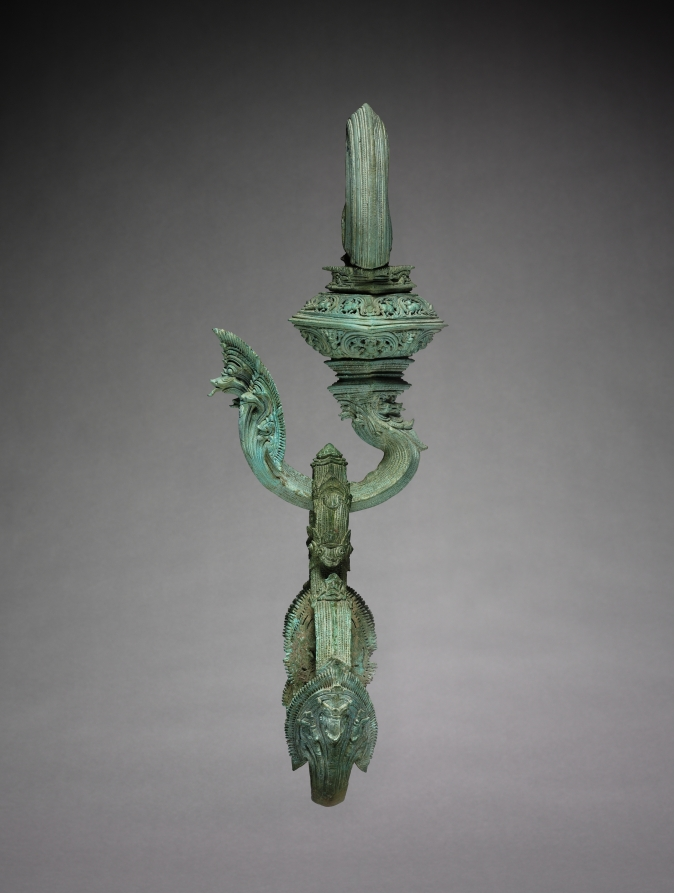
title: One of a Pair of Decorated Palanquin Hooks and Rings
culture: Cambodia, Angkor Wat Style, 12th century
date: 1100–1175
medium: bronze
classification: Sculpture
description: Hooks, suspension rings, and finials cast in bronze are very common fixtures in Cambodian decorative art. Frequently they served a practical function, such as the present set, used for a palanquin in which a person was carried from place to place. The litter or throne was fastened to the rings which in turn were suspended from the books fixed by bolts to transverse poles carried on the shoulders of the palanquin bearers. Chariots, palanquins, furniture, and harnesses were frequently embellished with various bronze decorations, finials, and fixtures. Those, as a rule, were gilded making the objects they served look very sumptuous. The relief sculpture found on various Khmer monuments, such as Angkor Wat or Bayon for instance, illustrates well the use and context of those bronze implements in ancient Cambodian life. These frequently elaborate bronze fixtures were decorated with motifs generally popular in Cambodian art: such as nagas, garudas, floral, or animal patterns. This pair of hooks and rings, unusually large in size, take on a naga form in the hooks. They are decorated with perforated floral and animal motifs done with great care and precision. The rings, suspended from hooks, are in the form of tri-fold flower stalks with naga motifs repeated at the end of the curved stalks. Such elaborate and huge hooks and rings must have, no doubt, decorated a palanquin of an important individual, possible a ruler himself. Their decoration is typical of the mature Angkor Wat style.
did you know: The naga, a water serpent with a multi-headed hood, is a Khmer national emblem.